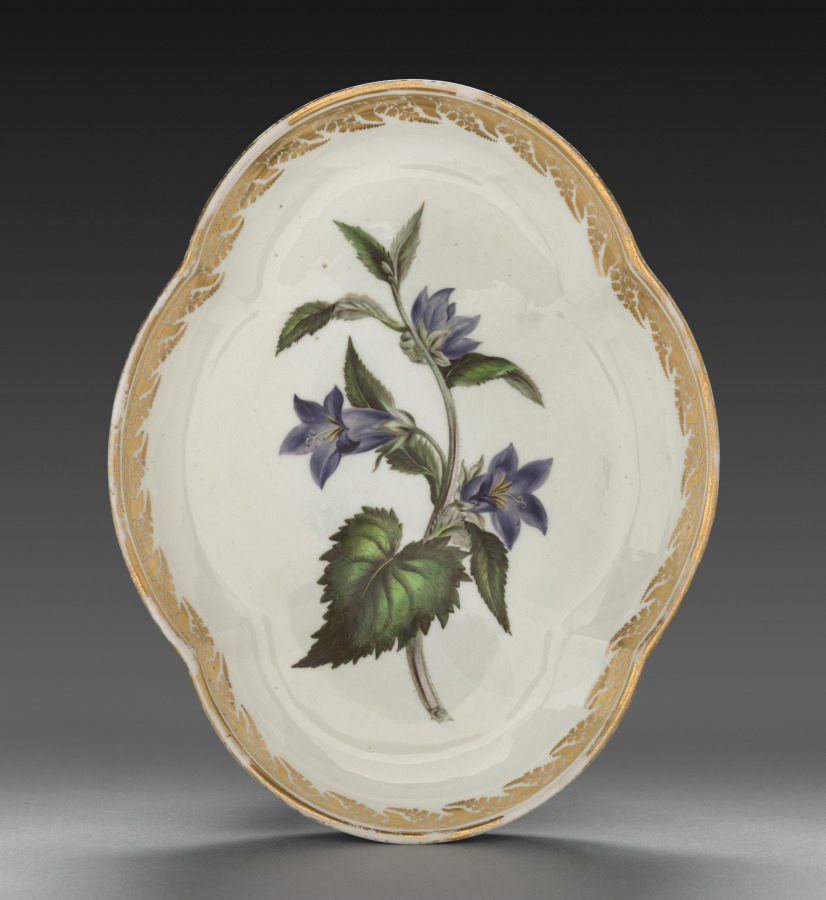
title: Quatrelobed Dish from Dessert Service: Nettle-leaved Bell Flower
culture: England, Derby, 18th century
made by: Derby (Crown Derby Period) (British)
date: c. 1800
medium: porcelain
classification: Ceramic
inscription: inscribed in blue on back: Campanula Triechelium./Nettle-leavid Bell-flower./crown/crossed batons and dots/D/115.